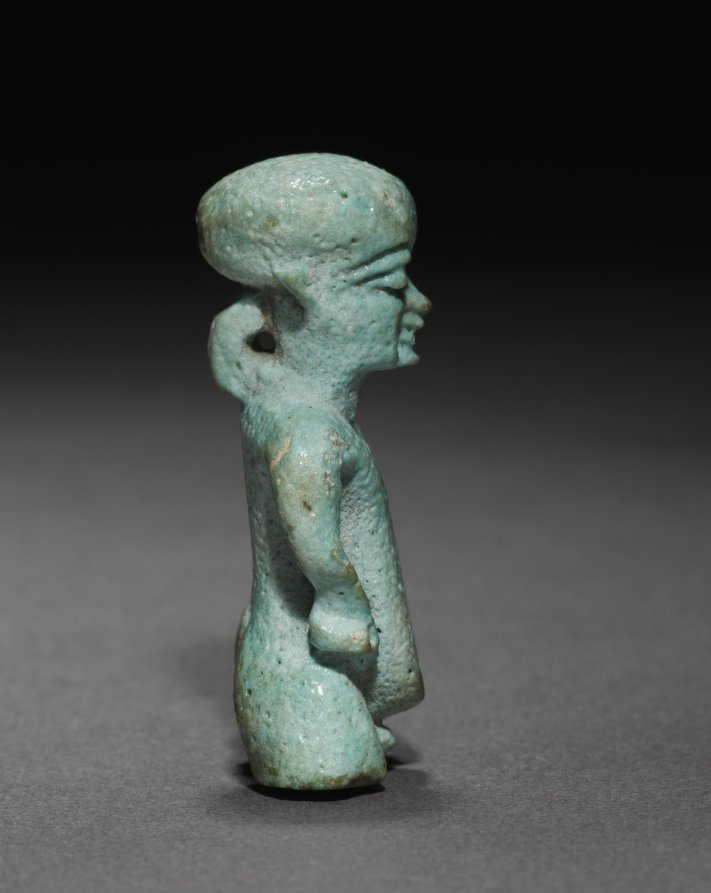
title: Amulet of Pataikos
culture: Egypt, Greco-Roman period (332 BCE–395 CE), Ptolemaic dynasty (305–30 BCE)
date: 305–30 BCE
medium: pale blue faience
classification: Amulets